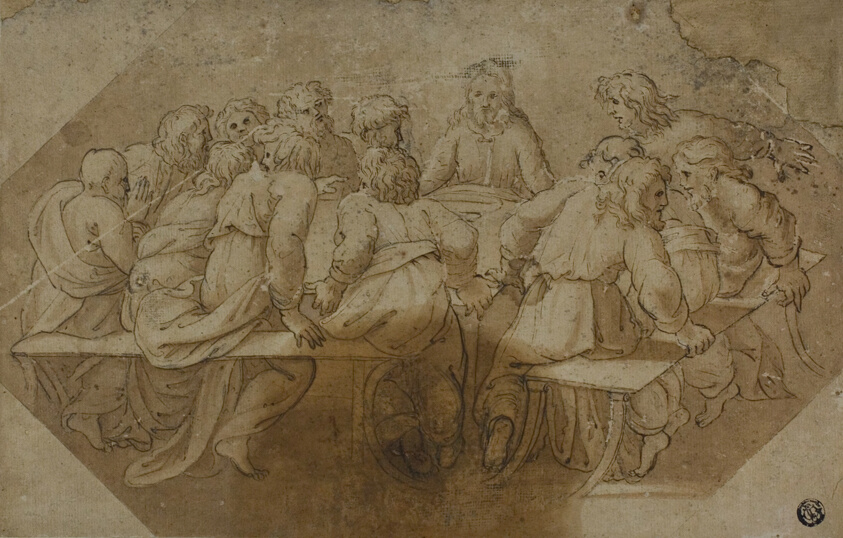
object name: Drawing and Watercolor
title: Last Supper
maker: After Raffaello Sanzio, called Raphael, and workshop; Italian, 1483-1520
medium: Pen and brown ink and brush and brown wash, with graphite additions, on cream laid paper, laid down on two layers of cream laid paper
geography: Italy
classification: ink and wash; drawings (visual works); prints and drawing